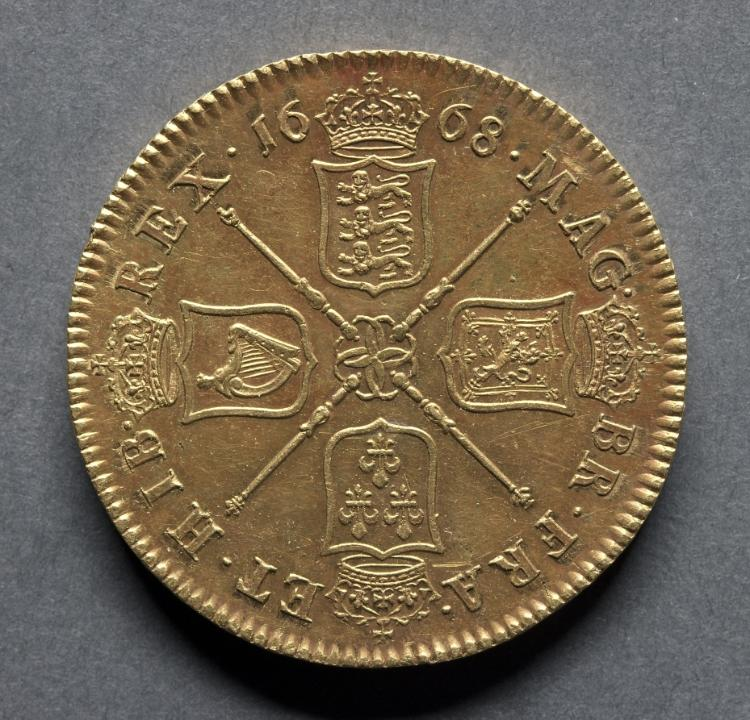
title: Five Guineas: Crowned Shields of Arms from England, Scotland, France, and Ireland (reverse)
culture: England, Charles II, 1660-1685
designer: John Roettier (British, 1631–1703)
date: 1668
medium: gold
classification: Coins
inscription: MAG . BR . FRA . ET . HIB . REX . 1669.